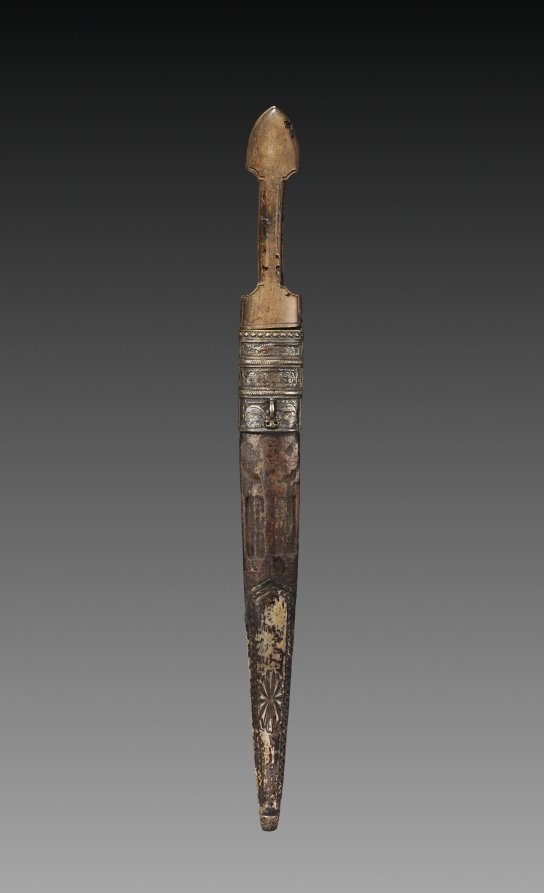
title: Dagger (Khanjali) with Scabbard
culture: Transcaucasian, Georgian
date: 1700s–1800s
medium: carnelian?, steel, wood handle, copper alloy, and silver gilt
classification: Arms and Armor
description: A khanjali is a dagger popular with the inhabitants of Georgia and the rest of the Caucasus since ancient times. They often have a single offset groove on each face of the blade and the shape is similar to the ancient Roman gladius and the Scottish dirk.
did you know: Scabbards for daggers like these are usually highly engraved with gold or silver designs and can sometimes include embedded gemstones.